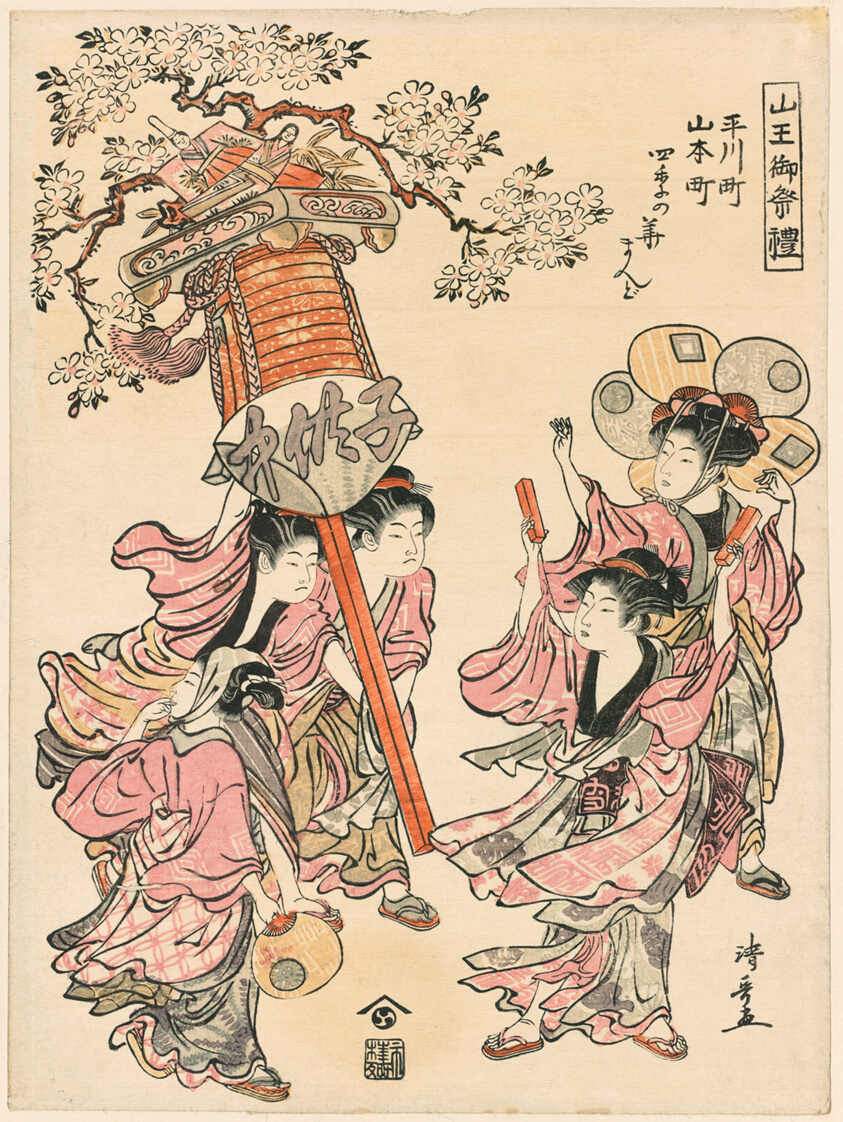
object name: Print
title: Carrying a Lantern Decorated with the Flowers of the Four Seasons (Hirakawa-cho Yamamoto-cho shiki no hana mando) from the series "The Festival of the Sanno Shrine (Sanno go-sairei)"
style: Japanese (culture or style)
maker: Torii Kiyonaga (Japanese, 1752-1815)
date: 1780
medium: Color woodblock print; chuban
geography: Japan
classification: woodblock print; print; asian art